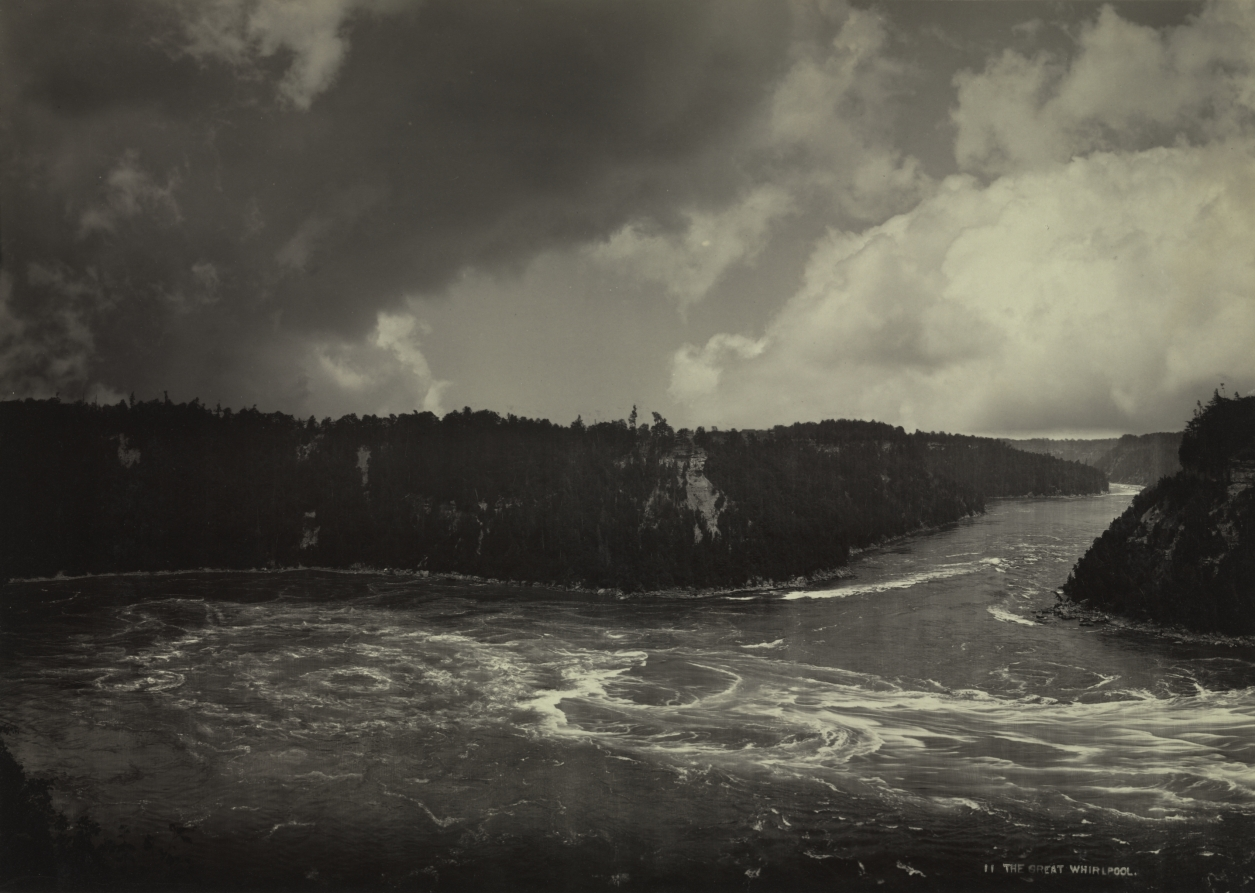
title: The Great Whirlpool, Niagara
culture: America or Canada, 19th century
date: c. 1880s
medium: albumen print from glass negative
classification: Photograph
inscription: Written in white ink on recto: "II THE GREAT WHIRLPOOL"; in red ink on recto of mount: "Niagara, the great Whirlpool"